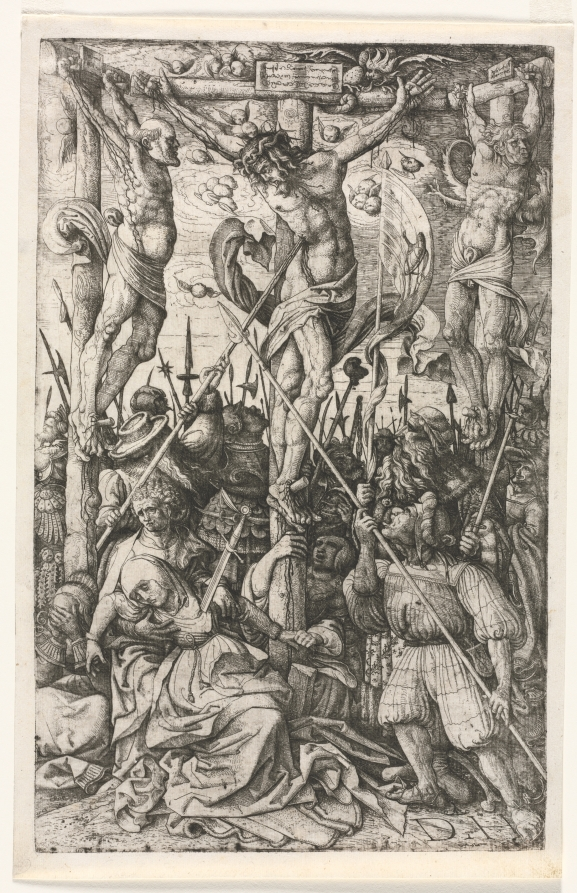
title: The Calvary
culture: Germany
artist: Daniel Hopfer (German, c. 1470–1536)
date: c. 1520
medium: etching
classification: Print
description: Although recipes for etching iron and steel are recorded at least as early as 1400, scholars have been unable to show that armor designs were etched in Italy or Germany before the end of the 15th century. As early as 1500 iron plates were also used to make prints, probably first in Augsburg, Germany, in the workshop of Daniel Hopfer. Etching allows the artist to draw freely on the plate and so is less laborious than engraving. Because of the acid then available, only iron or steel plates could be used and these rusted. For this reason only a small number of etchings were made (including six by Albrecht Dürer) until about 1550, when the technical difficulties of using copper plates had been overcome.